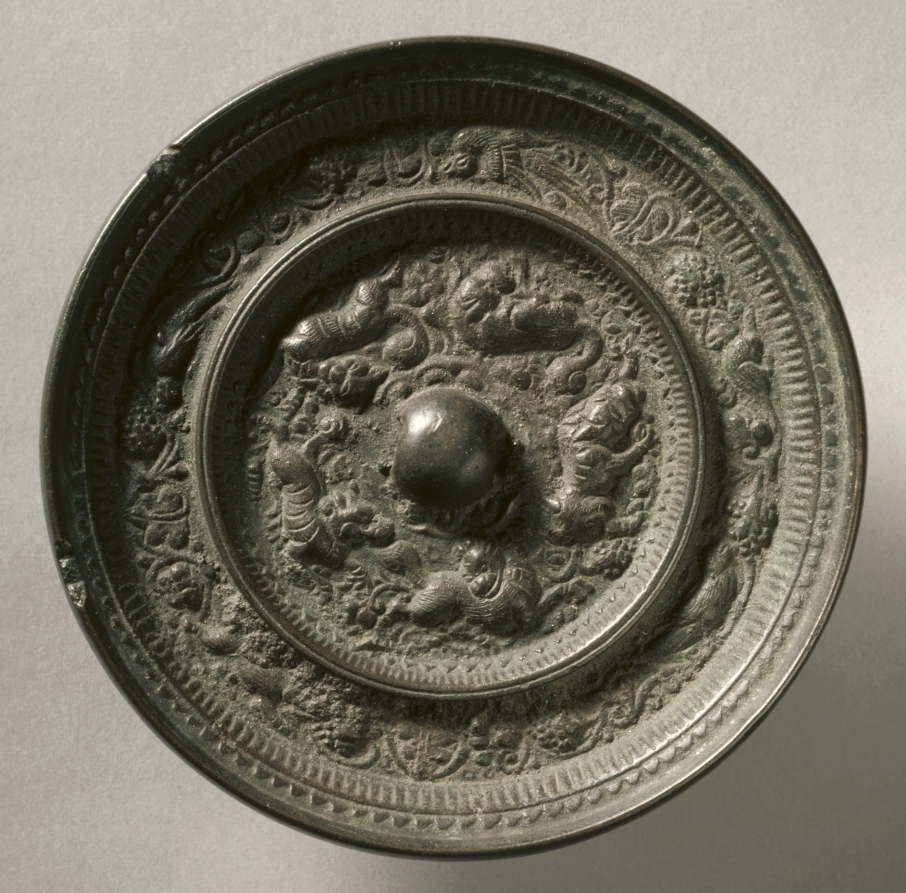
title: Animal-and-Grape Mirror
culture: China, Jin dynasty (1115-1234)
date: early 1100s–mid-1200s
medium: bronze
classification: Metalwork